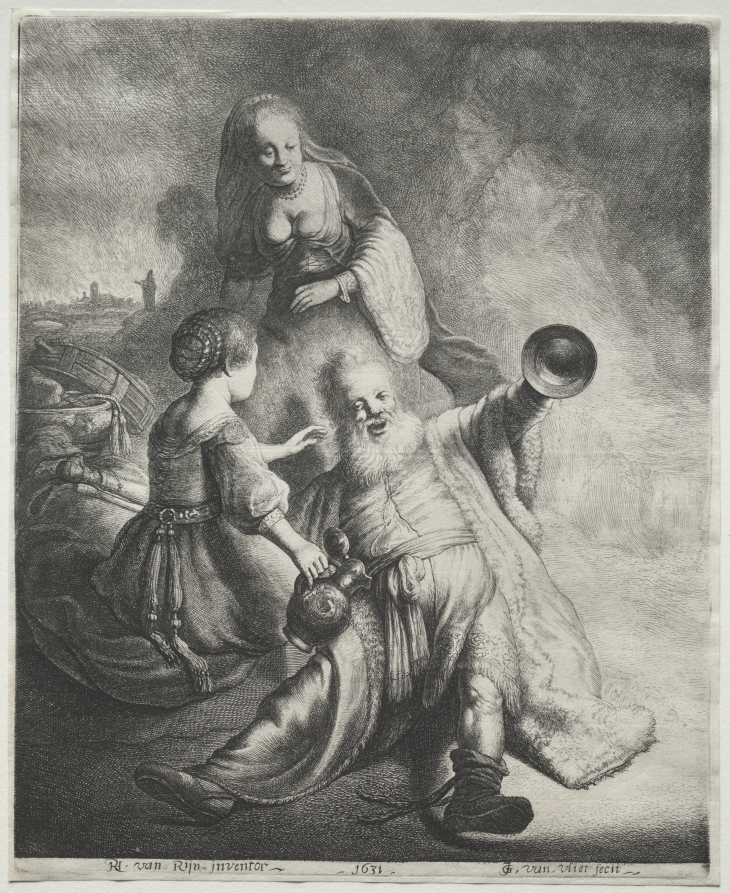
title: Lot and His Daughters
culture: Netherlands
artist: Jan Georg van Vliet (Dutch, c. 1610–1635)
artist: after Rembrandt van Rijn (Dutch, 1606–1669)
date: 1631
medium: etching and engraving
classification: Print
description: As a cautionary tale on the dangers of lust and alcohol, the biblical narrative of Lot and his daughters held appeal for artists, but it also raised complex questions about duty, sacrifice, and free will. In Rembrandt van Rijn’s version (etched here by Jan Georg van Vliet), the artist presented us with an inebriated older Lot, whose drunken expression is reminiscent of a patron at a local tavern. His daughters supply alcohol with coarse amusement.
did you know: The loosened bodice and escaping bosom of the central female figure likely signaled her lapsed morals to contemporary viewers.